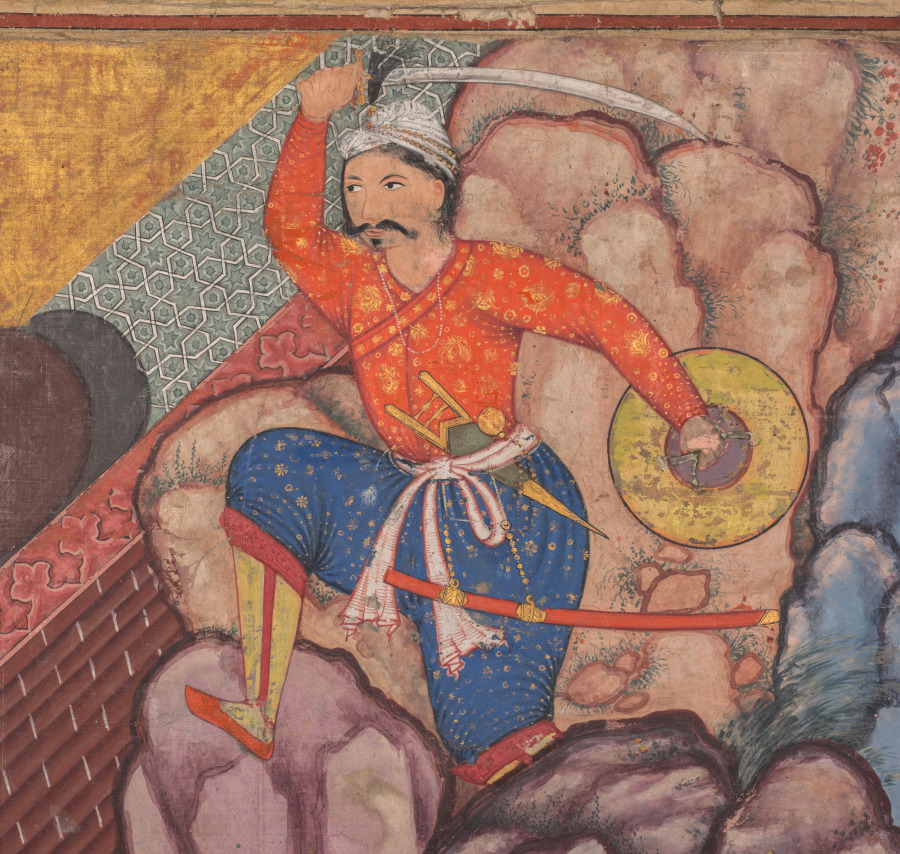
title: Alamshah cleaving asunder the chain of the wheel, from volume 11 of a Hamza-nama (Adventures of Hamza)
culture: Mughal India, court of Akbar (reigned 1556–1605)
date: c. 1560s–70s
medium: Gum tempera, ink, and gold on cotton and paper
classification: Painting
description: The hero, Alamshah the Greek, perches on a cliff above a rushing torrent of water. He has just slain the villain who raised the massive bronze plug on the dam in order to wash away the camp of Alamshah’s father, Hamza. The Hamza-nama recounts the adventures of an uncle of the Prophet Mohammed. It was the first major undertaking of the fledgling painting workshop created by Akbar. Originally in 14 volumes of 100 illustrations each, just a little more than 10 percent of the pages survive.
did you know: The title in the bottom margin is a continuation of the text on the previous page.